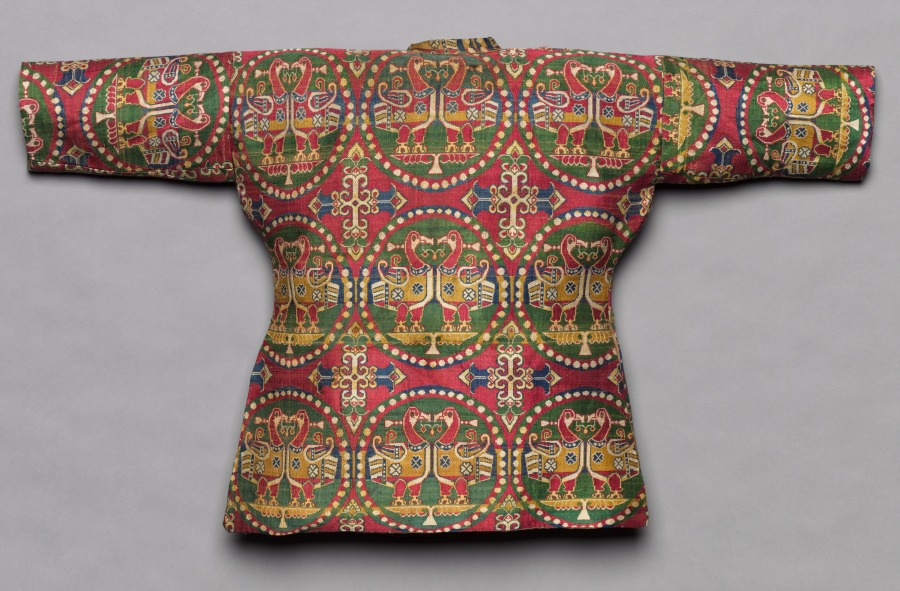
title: Child’s Coat with Ducks in Pearl Medallions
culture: Probably Sogdia (present-day Uzbekistan); China, Tang dynasty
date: 700s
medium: Silk: weft-faced compound twill weave (samite)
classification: Garment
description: The coat’s outer fabric is woven in five brilliant colors featuring paired ducks in pearl roundels, hallmarks of the precious and highly desired silks from Sogdia. The coat’s inner lining is a twill damask with a floral pattern made in China. The combination of Sogdian and Chinese silks in one garment with Tibetan ownership history is evidence of the vital exchange and cultural interaction among the peoples living along the trade routes of the Silk Road. This precious coat was presumably made for a Tibetan prince. Given the coat’s pristine condition, though, it is unclear whether the garment was ever worn, or was used as a diplomatic gift or perhaps as currency.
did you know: This coat is part of a set of garments that originally included an outer pair of pants and silk boots made from the same fabric.